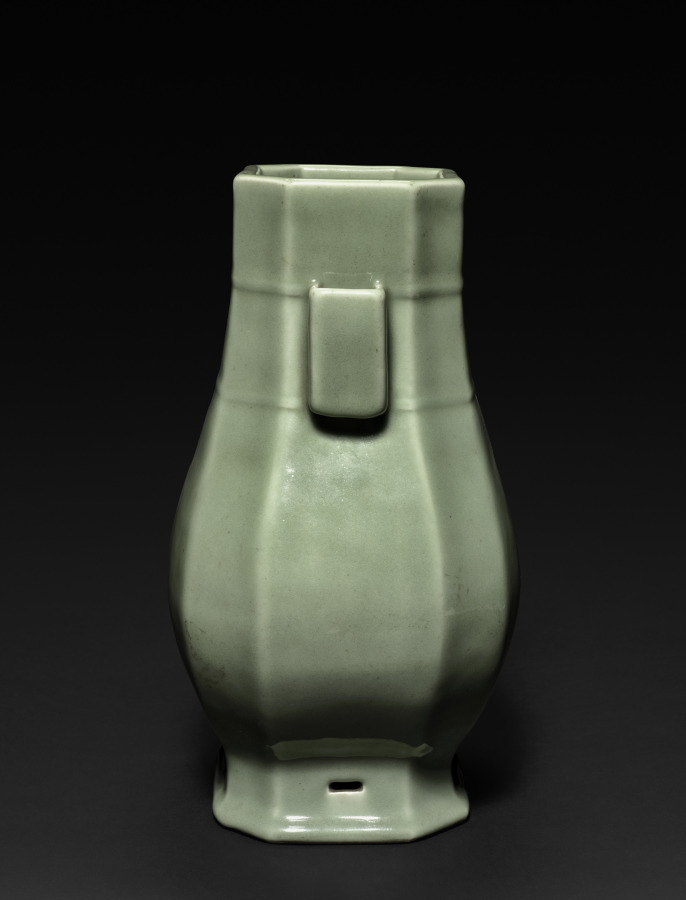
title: Suspension Vase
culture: China, Jiangxi Province, Jingdezhen kilns, Qing dynasty (1644–1911), Yongzheng mark and reign (1722–35)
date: 1723–35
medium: porcelain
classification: Ceramic